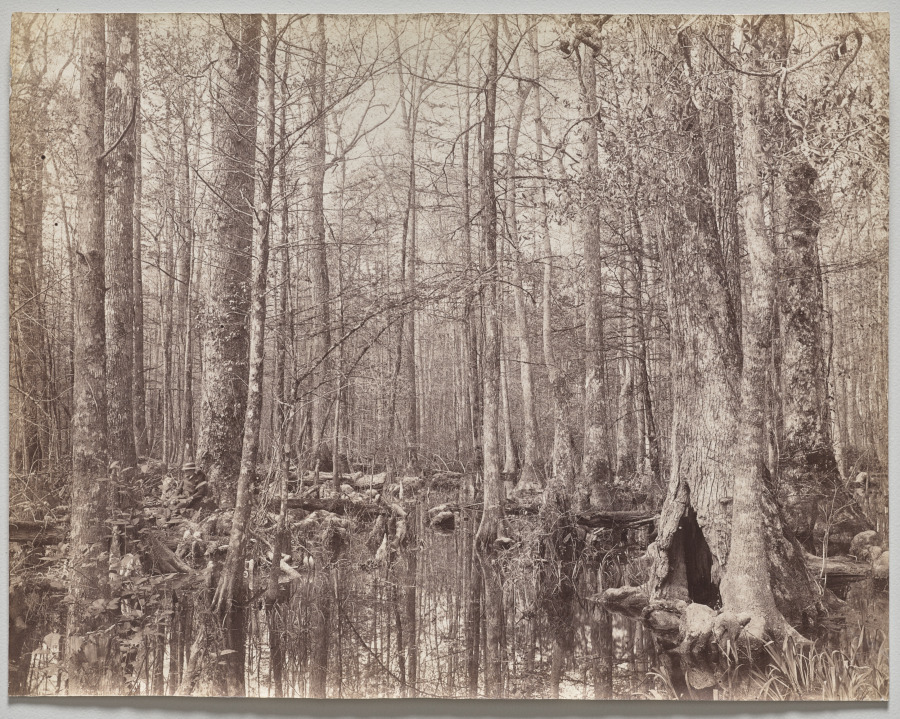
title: Great Dismal Swamp, Virginia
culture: America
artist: Israel Cook Russell (American, 1852–1906)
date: c. 1872–90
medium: albumen print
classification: Photograph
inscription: Handwritten in graphite on verso of photograph a/o mat: "C.H. Merriam, attrib.; Dismal Swamp, NC, c. 1880 (?); GE 1890.2; 172; 450"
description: Israel Cook Russell’s view of the Great Dismal Swamp, which straddles the border between Virginia and North Carolina, evokes both the locale’s abundance of timber and its sense of desolation. Russell, a celebrated geologist, took care to express the geological and biological forces that shaped landscapes but also to create images of artistic value.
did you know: From the 1700s through the Civil War, the Great Dismal Swamp’s timber was harvested by slave labor, yet the swamp also housed numerous people who had escaped slavery.